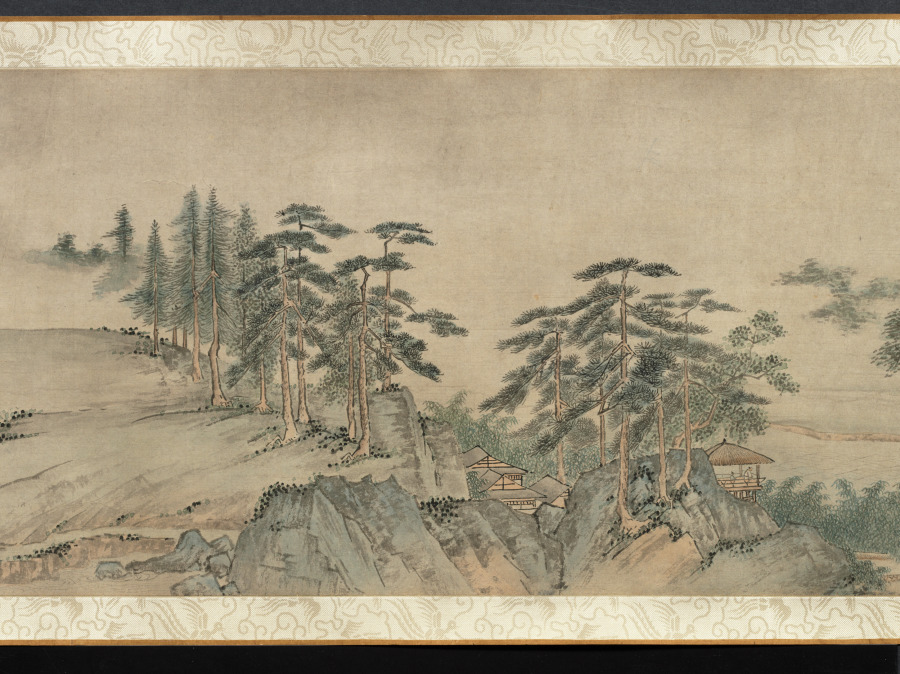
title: Ten Thousand Li of the Yangzi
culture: China, Ming dynasty (1368–1644)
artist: Dai Jin (Chinese, 1388–1462)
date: c. 1400s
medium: Handscroll; ink and color on paper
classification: Painting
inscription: Two colophons at end. Artist's seals: Dai Jin 戴進 and Wenjin 文進.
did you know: Dai Jin is traditionally considered the founder of the Zhe School, a style of landscape painting.